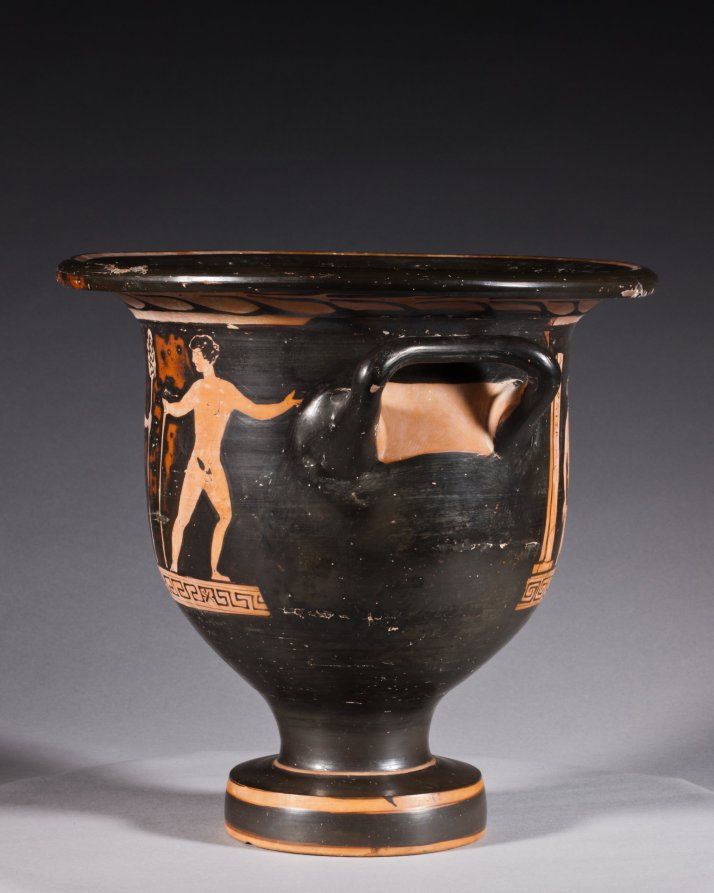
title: Red-Figure Bell Krater (Mixing Vessel): Aphrodite and Eros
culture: South Italian, Apulian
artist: attributed to Graz Painter (South Italian, Apulian, active c. 380–360 BCE)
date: c. 370–360 BCE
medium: ceramic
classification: Ceramic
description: This small mixing vessel shows a finely dressed woman seated on a chest and holding up a mirror to admire herself. Before her stands Eros, the winged god of love, holding a ribbon or sash. Behind the woman stands a pillar with the inscription ΑΦΡΟΔΙΤΗ, or APHRODITE, the goddess of love. Such labels are rare on vases, and scholars debate whether this names the woman shown as Aphrodite herself, with her son Eros, or a bride envisioning herself as Aphrodite, just before her wedding.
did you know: The dancing nude youths on the reverse are unusual; typically they would be standing and draped.